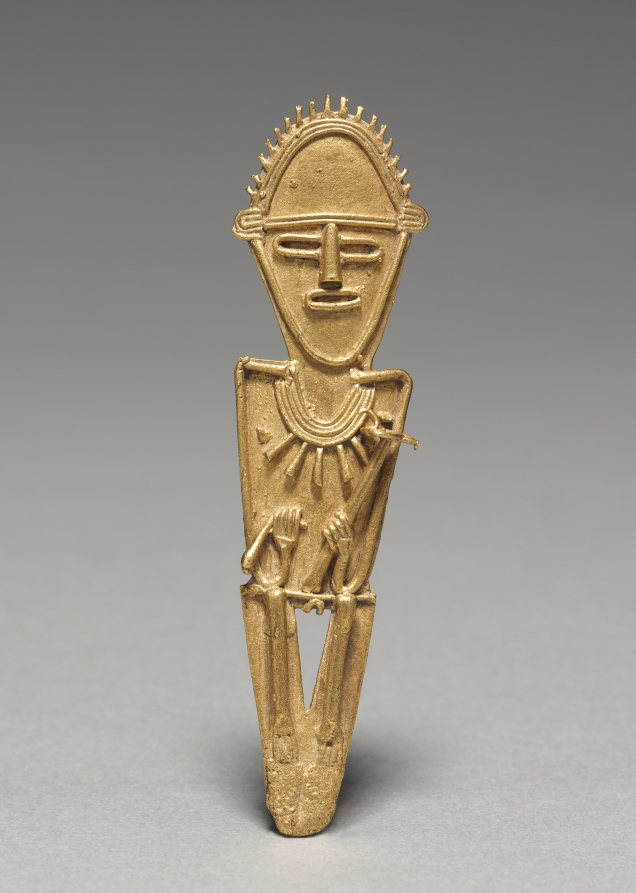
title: Tunjos (Votive Offering Figurine)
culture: Colombia, Muisca style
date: c. 900–1550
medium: cast gold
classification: Metalwork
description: Unlike the other gold ornaments made in the isthmian region, tunjos were not worn; instead, they served as offerings that were deposited in sacred places such as lagoons and caves. They often depict humans who hold something. Perhaps because they were not meant for display, tunjos were not finished after lost-wax casting. Flaws remain uncorrected, surfaces are unpolished, and gold that backed into the channel used to pour the molten metal into the mold was left in place.